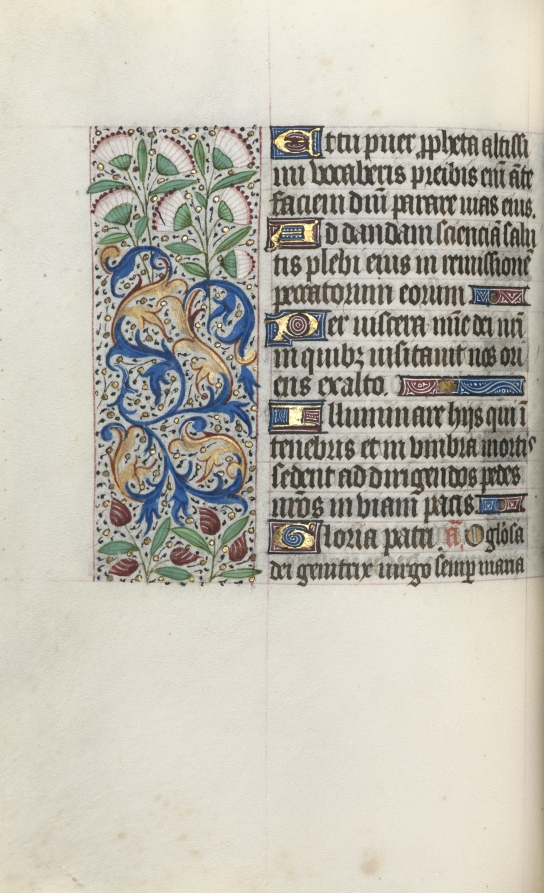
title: Book of Hours (Use of Rouen): fol. 48v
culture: France, Rouen, 15th century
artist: Master of the Geneva Latini (French, active Rouen, 1460–80)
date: c. 1470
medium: ink, tempera, and gold on vellum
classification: Bound Volume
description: In the late 1400s and early 1500s Rouen was an established and important center of book production. The city’s cathedral had a wealthy chapter that spent large sums of money to commission books and to maintain its extensive library. The stationers and booksellers would have likely been concentrated in or near the cathedral precinct. This artist, named after a manuscript now in Geneva, was Rouen’s principal illuminator during the second half of the 1400s.